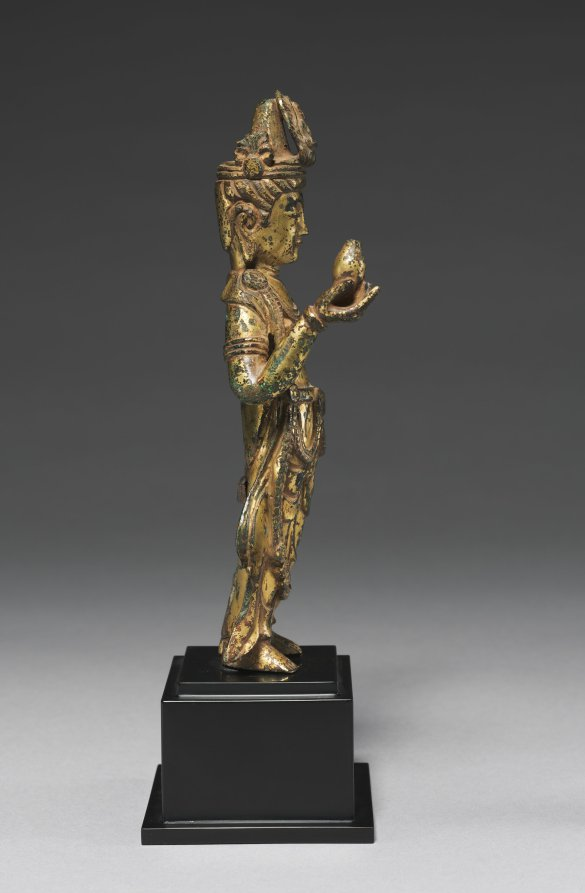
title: Standing Avalokitesvara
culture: Korea, Unified Silla period (668-935)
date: 700s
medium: Gilt-bronze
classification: Sculpture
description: This small gilt-bronze statue represents the Bodhisattva of Compassion (관음보살 in Korean), an enlightened being who helps devotees on their path. It features two prominent attributes: a water sprinkler (kundika in Sanskrit) and a miniature image of Buddha Amitābha in its jeweled crown. Its sweet and gentle smile accentuates this celestial being’s immeasurable compassion for human suffering.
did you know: Created during the Unified Silla period, a high point of the spread of Buddhist teachings, this kind of miniature gilt-bronze statue was often used as a portable object of devotion by traveling Buddhist monks.